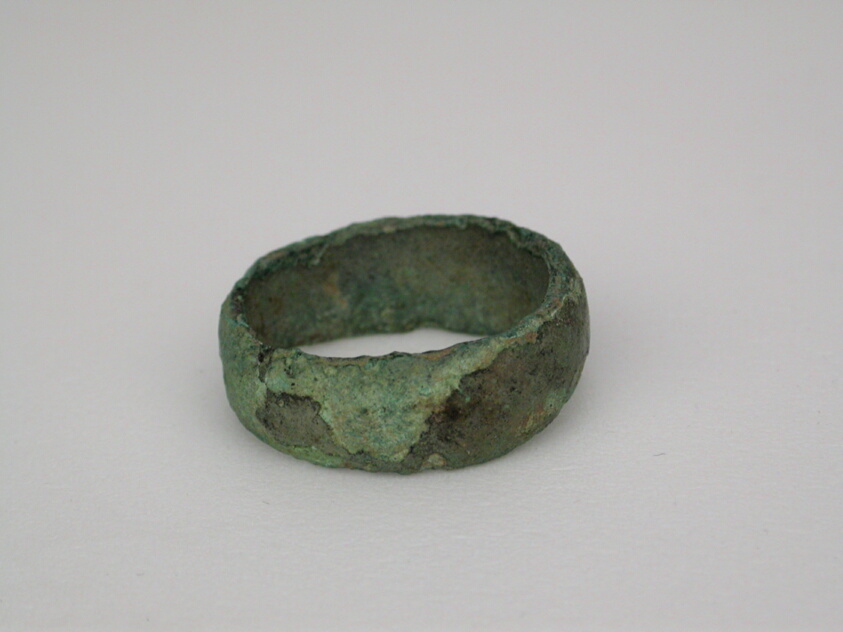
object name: Decorative Arts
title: Harness Ring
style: geometric, ancient, greek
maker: Greek; Thessaly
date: Geometric Period (800–600 BCE)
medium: Bronze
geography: Thessalía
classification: votive offering; ex-voto; decorative arts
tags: circles